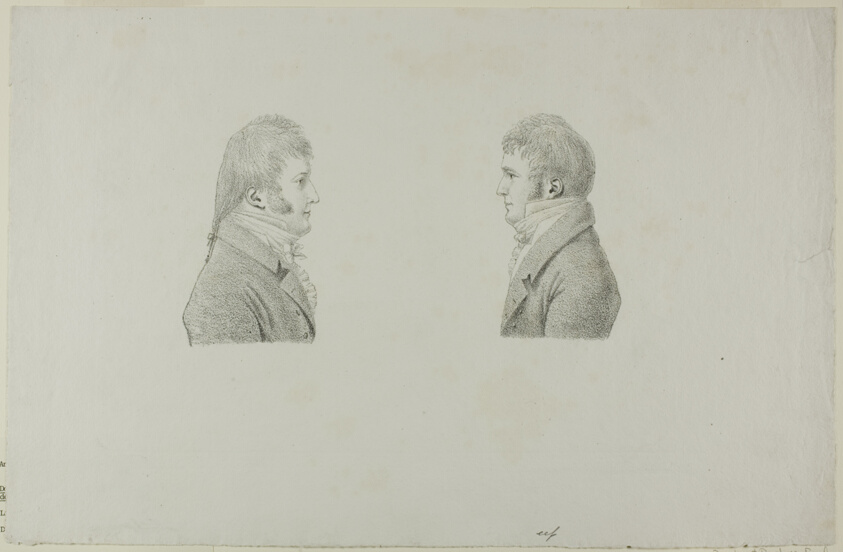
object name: Print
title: Portraits of King Louis Philippe & Antoine Philippe d'Orleans, duc de Montpensier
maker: Antoine Philippe d'Orléans (French, 1775-1807); printed by Philipp André (German, active London, 1800–1805)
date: 1805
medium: Lithograph in black on ivory wove paper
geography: France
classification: lithograph; print; prints and drawing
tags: portraits